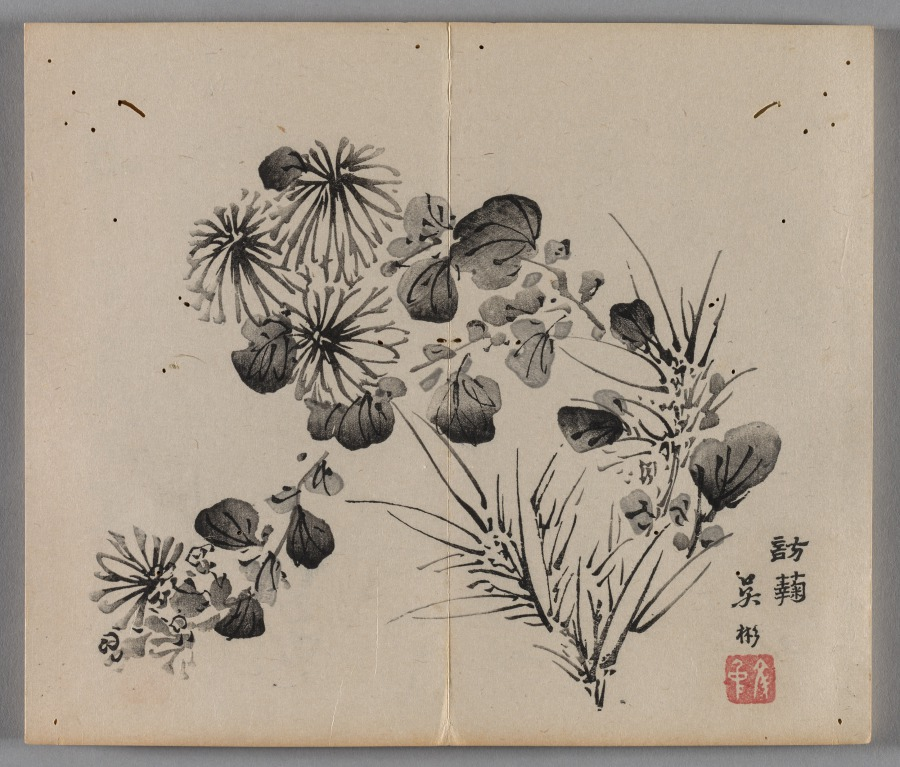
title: Ten Bamboo Studio Painting and Calligraphy Handbook (Shizhuzhai shuhua pu): Bamboo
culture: China, Qing dynasty (1644-1911)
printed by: Hu Zhengyan (Chinese, c. 1584–1674)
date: 1633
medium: Woodblock-printed book; ink and colors on paper; first edition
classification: Print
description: Color printing reached a level of perfection in the early 1600s, as seen in this Ten Bamboo Studio Collection of Calligraphy and Painting and the Mustard Seed Garden Manual of Painting (printed 1679 and 1701). The painterly quality, precision in registering (aligning) the woodblocks, and harmonious colors made them the most successful color print editions in Chinese history. Both editions were printed and compiled in Nanjing, spread nationwide, and had a great impact on the arts in Japan and Korea.